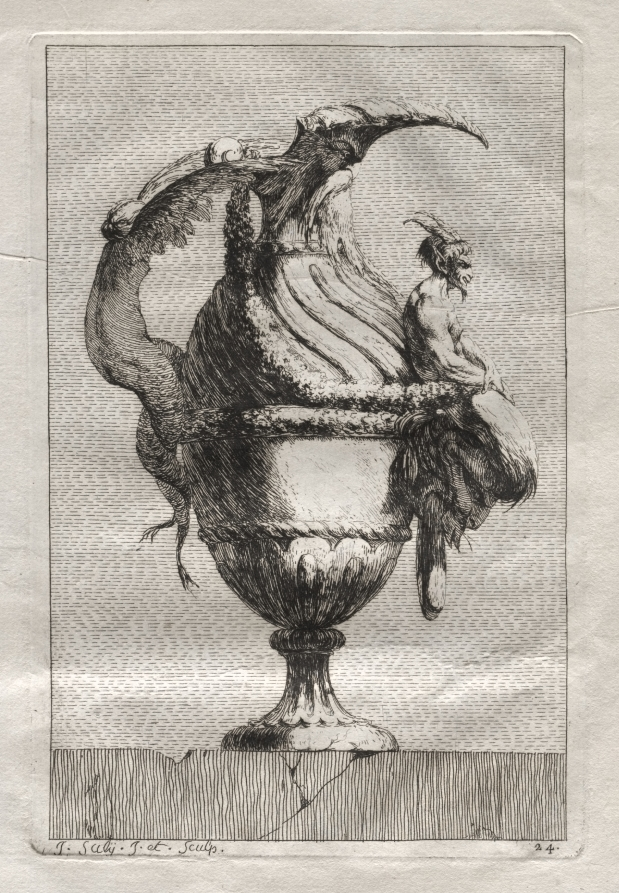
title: Suite of Vases: Plate 24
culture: France, 18th century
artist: Jacques François Saly (French, 1717–1776)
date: 1746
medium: etching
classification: Print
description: Trained as a sculptor, Saly etched a series of 30 vase designs while studying at the Académie de France in Rome. After his return to Paris, the publication announcement for the Suite of Vases endorsed the prints as an indication of the sculptor’s ingenuity and freedom of design. The vase designs also nourished an appetite for the revival of classical elements, or Neoclassicism, in decorative arts that developed in the mid-18th century.